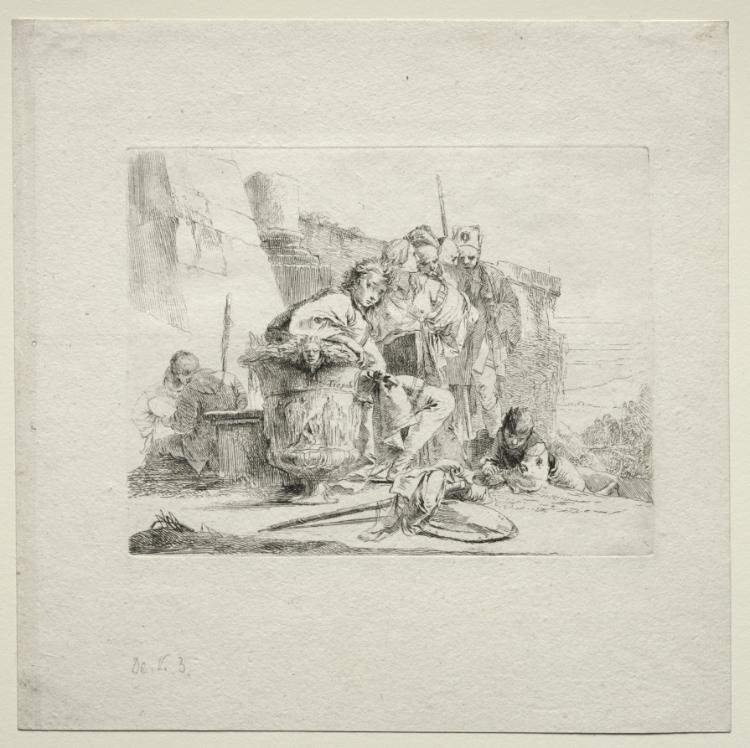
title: Various Caprices: The Young Man Seated, Leaning Against an Urn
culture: Italy, 18th century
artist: Giovanni Battista Tiepolo (Italian, 1696–1770)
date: 1735–50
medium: etching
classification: Print